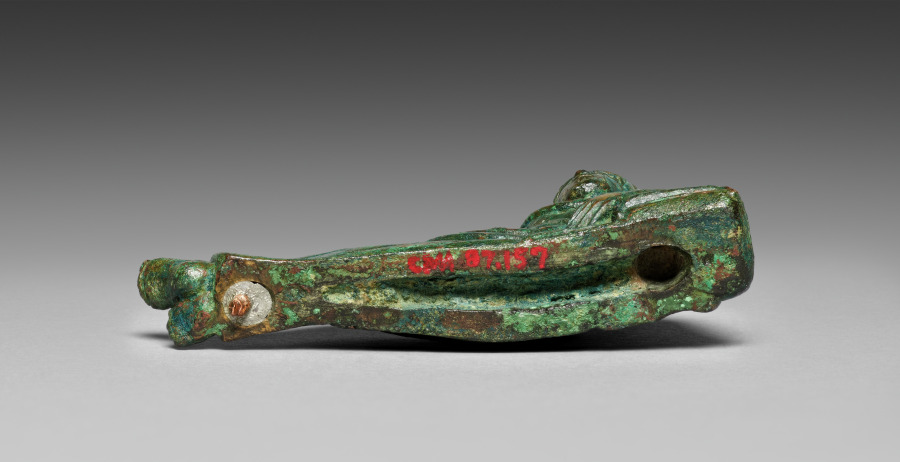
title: Vessel Ornament of Banqueter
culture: Etruscan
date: probably 400–375 BCE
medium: bronze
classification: Sculpture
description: This bronze banqueter figurine was one of six once adorning the rim of a large basin, now lost. Cast in molds with individualized details, most have grooves on their underside to attach to the basin. Minute traces of gilding remain on areas of clothing and skin (mostly visible only under magnification), suggesting that they may have been completely gilded. Two handles in the form of hippocampi, horses with serpentine tails, also belonged to the basin and are now displayed at the Michael C. Carlos Museum at Emory University. The basin may have been used to hold liquid for a banquet, or was perhaps funerary. This reclining bronze figurine’s left arm rests on the drapery covering his shoulder. His right arm is raised and broken at the wrist. Garlands rest on his head and chest. Traces of gilding remain in the garlands and drapery folds. The figurine is very similar to 1987.157, suggesting that he may have held a phiale mesomphalos, a shallow bowl used for wine libations to the gods.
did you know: Representations like this figurine suggest that Etruscan banqueters may have worn garlands made of flowers or leaves.